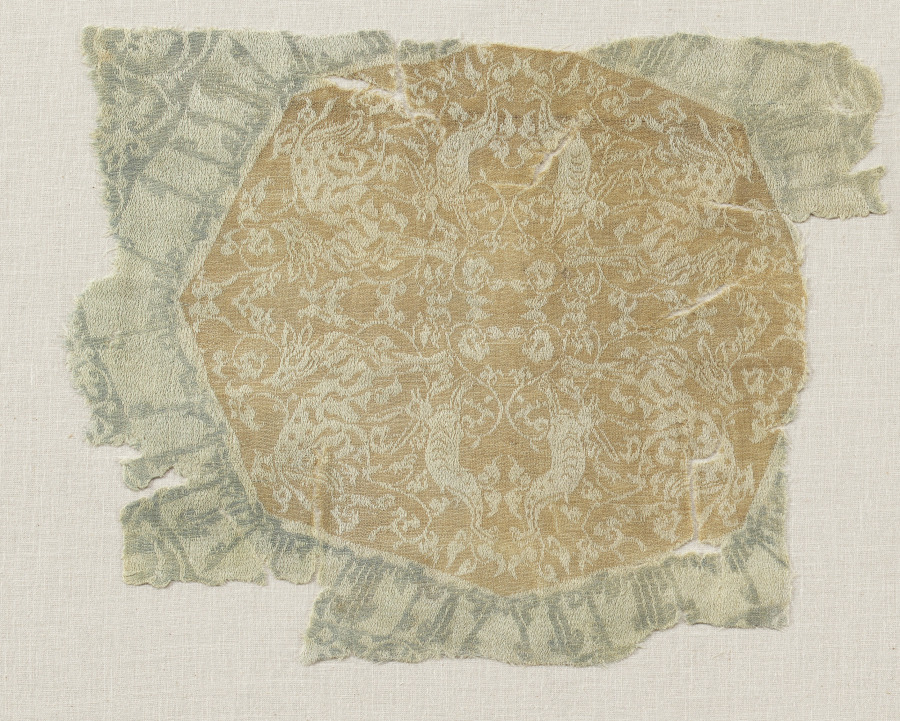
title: Fragment with Octagons and Four-Pointed Stars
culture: Iran or Iraq, in the style of the Seljuq period (1037–1194)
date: before 1949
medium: Silk: lampas weave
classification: Textile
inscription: inni la-'a'lamu wal-layl janan anna al-jannah fi arja' difafihi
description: The design consists of aligned large-scale octagons and four-pointed star-shaped interspaces filled with leafy scrolls. Each octagon encloses pairs of regardant gazelles and non-regardant rabbits in mirror image against a foliate background, patterned in white on a light pinkish-tan ground. Framing the octagon is a Kufic inscription repeated in orthograde and retrograde around the central design.